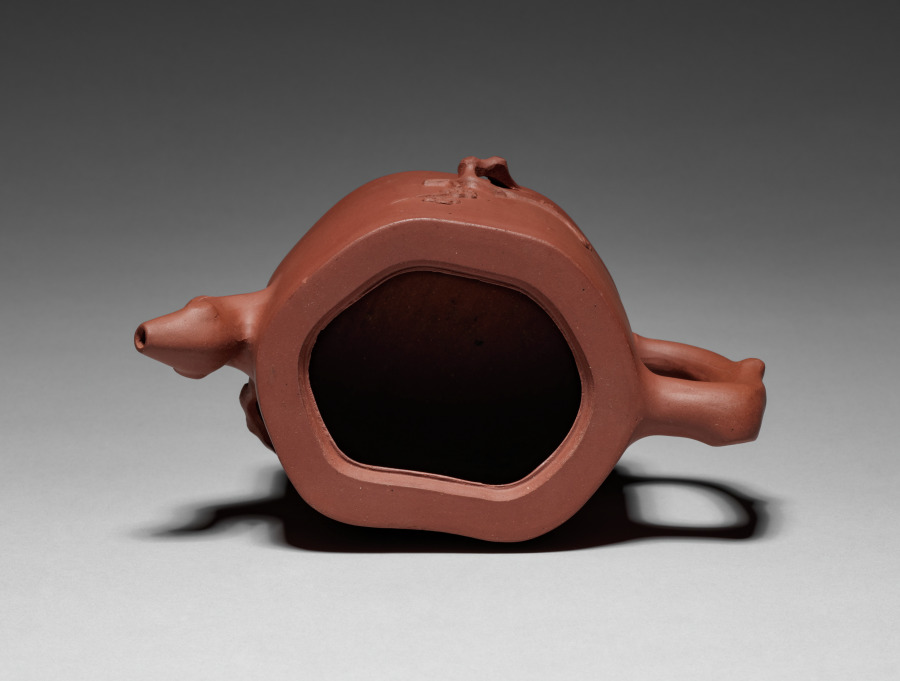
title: Yixing Teapot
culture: China, Qing dynasty (1644-1911)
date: 1800s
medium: stoneware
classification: Ceramic